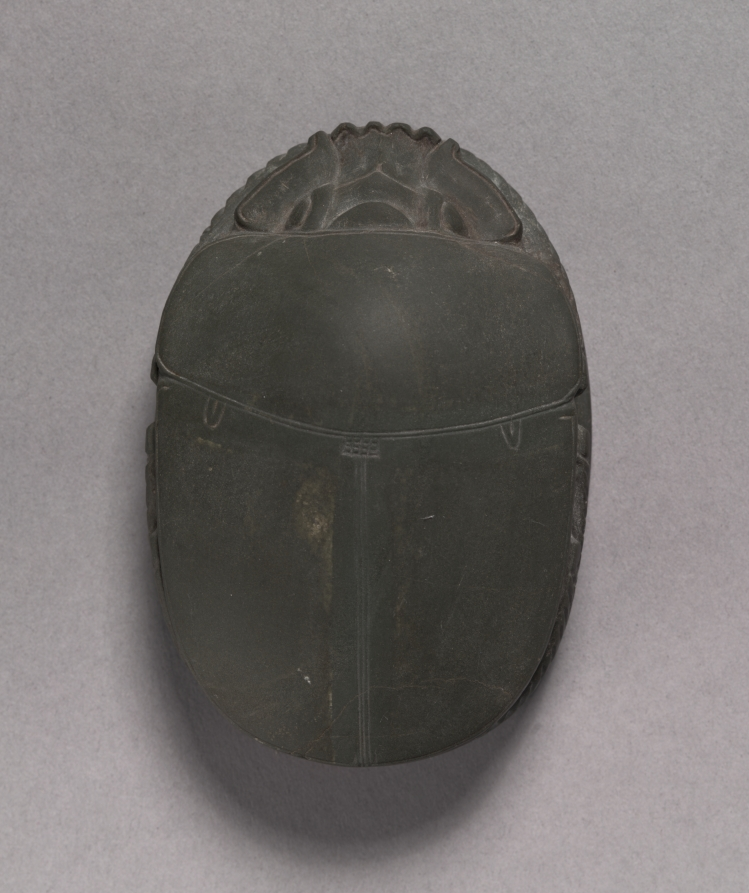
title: Heart Scarab of Nefer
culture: Egypt, New Kingdom (1540–1069 BCE), Dynasty 18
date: 1540–1296 BCE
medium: graywacke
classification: Scarabs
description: The design features in these objects borrow various ancient Egyptian funerary elements. The scale illustrated on top of the Cartier vanity case refers to the scale used in Osiris’s final judgment of the deceased. Amulets like the heart scarab were essential to the mummification process. They were placed throughout the mummy’s wrappings to protect the deceased during their journey in the afterlife. These inspired the Dior brooch seen on the model here. The ancient Egyptians believed amulets carried spells and that some, like the heart scarab, could sway opinions during the final judgement to help the deceased get to their version of heaven, called Iaru.